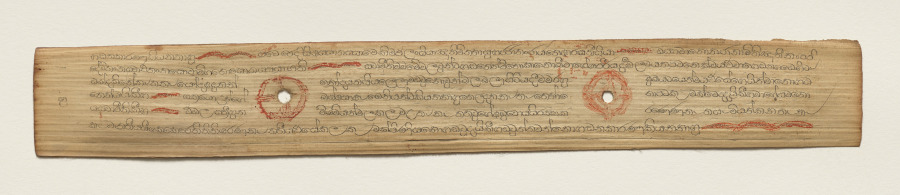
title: Leaf from a Buddhist Manuscript (recto)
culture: Sri Lanka, Singhalese, Late 17th century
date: c. 1700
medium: fiber paper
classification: Manuscript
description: Palm leaf material is still used for manuscripts in Sri Lanka. The palm leaves are prepared first by boiling them, drying them in the sun, and then rubbing them with oils. Scribes then use a metal stylus to incise the text. Then charcoal powder is wiped across the pages, filling in only the inscribed lines.